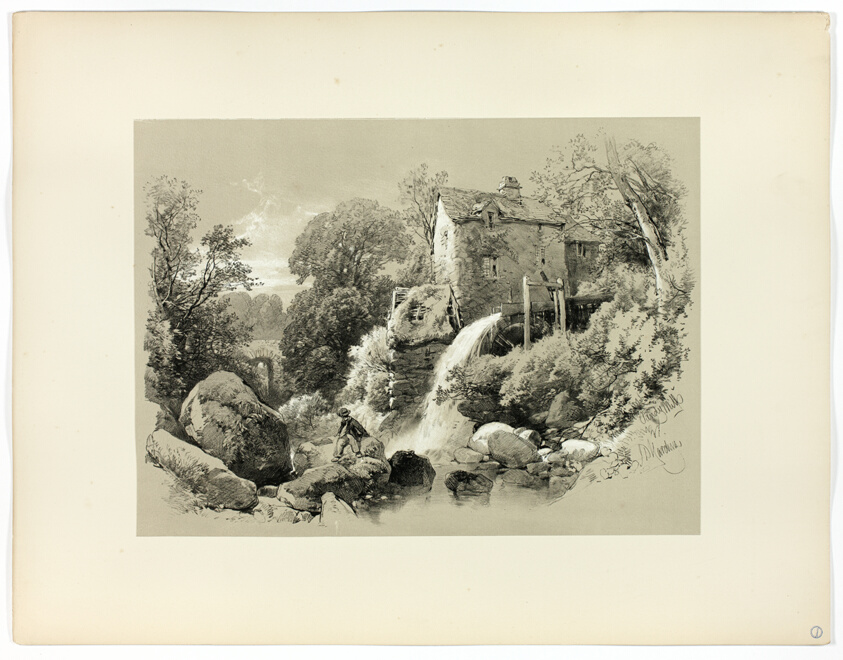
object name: Print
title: Pandy Mill, from Picturesque Selections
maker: James Duffield Harding, (English, 1798-1863); Published by W. Kent and Co.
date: c. 1859–60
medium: Lithograph on paper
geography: England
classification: lithograph; print; prints and drawing